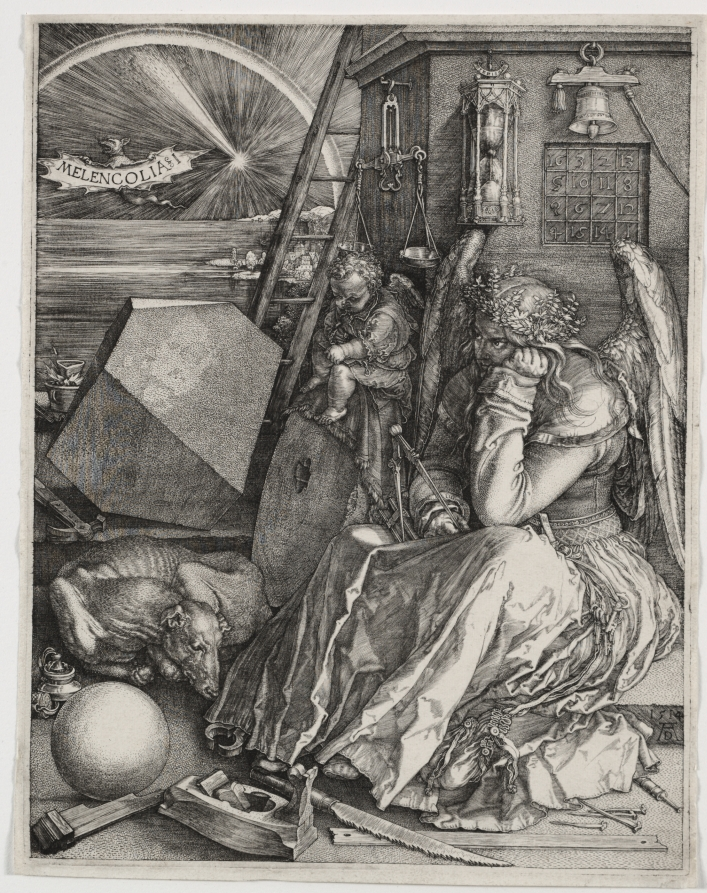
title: Melencolia I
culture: Germany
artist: Albrecht Dürer (German, 1471–1528)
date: 1514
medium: engraving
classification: Print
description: Although the title indentifies the subject as melancholy, the means by which Dürer demonstrates this emotional state is complex, making Melencolia I the most analyzed and discussed of Dürer’s works. Dürer personifies melancholy as a formidable female—her power originates in her ability to alter a man’s temperament into a melancholic state. Immobilized by her lack of creativity, the winged goddess sits dispiritedly surrounded by the tools and instruments she has lost the inspiration to use. Among intellectuals, melancholy was often associated with introspective, educated people, even genius. Because artists were especially prone to melancholy, this image has been interpreted as Dürer’s spiritual self-portrait, implying that the artist identified with her creative plight.